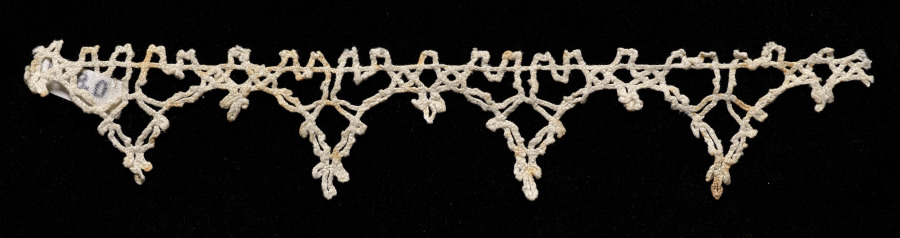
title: Lace Edging with Points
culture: Italy, Venice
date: 1540–60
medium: Bobbin lace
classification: Lace